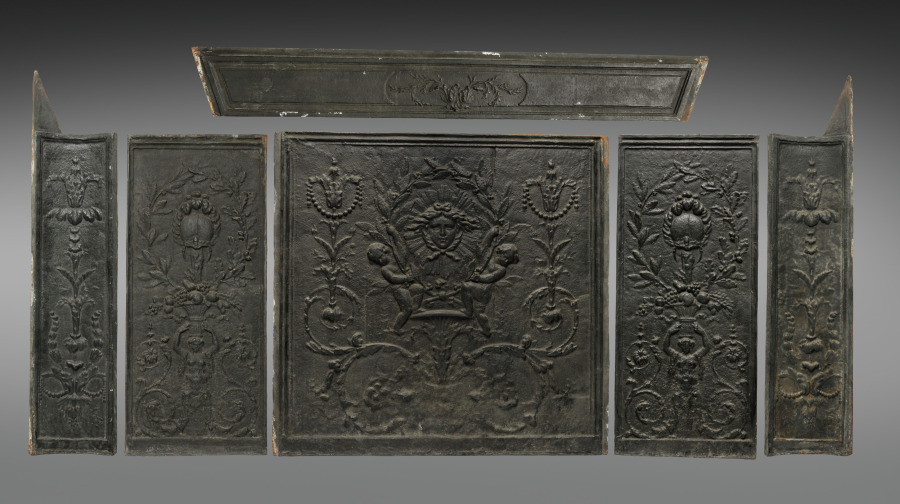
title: Set of Fire Linings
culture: France, style of Louis XVI, 18th Century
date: c. 1770–1780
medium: cast iron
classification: Furniture and woodwork